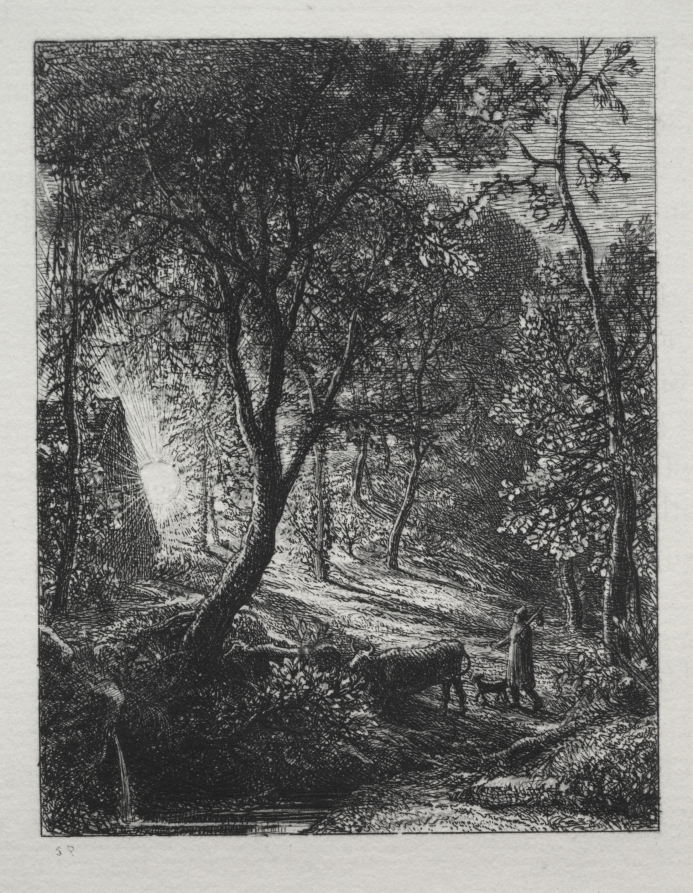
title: The Herdsman's Cottage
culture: England, 19th century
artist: Samuel Palmer (British, 1805–1881)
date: 1850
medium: etching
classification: Print